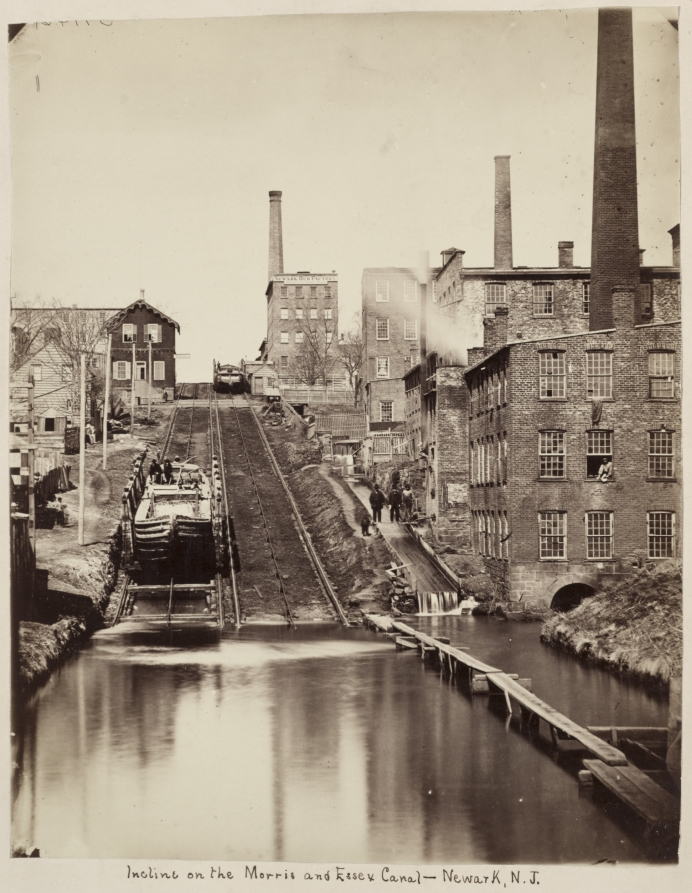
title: Incline on the Morris and Essex Canal, Newark, New Jersey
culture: America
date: c. 1870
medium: albumen print from wet collodion negative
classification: Photograph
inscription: Written in brown ink on recto of mount: "Incline on the Morris and Essex Canal-Newark, N.J."; on the verso of the mount, written in pencil: "Anonymous/ VII51 (?).